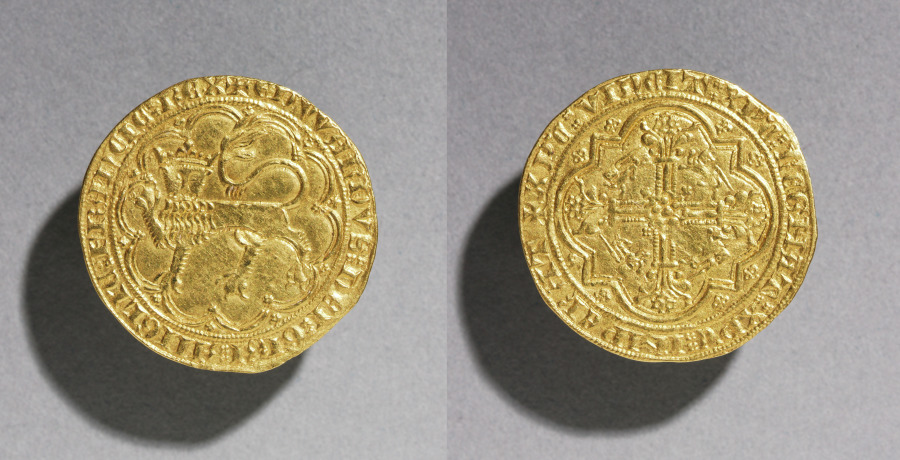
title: Leopard d'Or of Edward III of England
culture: England, Anglo-Gallic, Gothic period, 14th century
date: 1327–1377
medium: gold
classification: Coins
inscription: crowned leopard passant left framed in double arches and inscription: EDVVARDVS:DEI:GRA:ANGLI:FRANCIE:REX.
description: Known as a "Golden Leopard" because of the crowned leopard on one side, this gold coin was minted for Edward III, king of England and France.